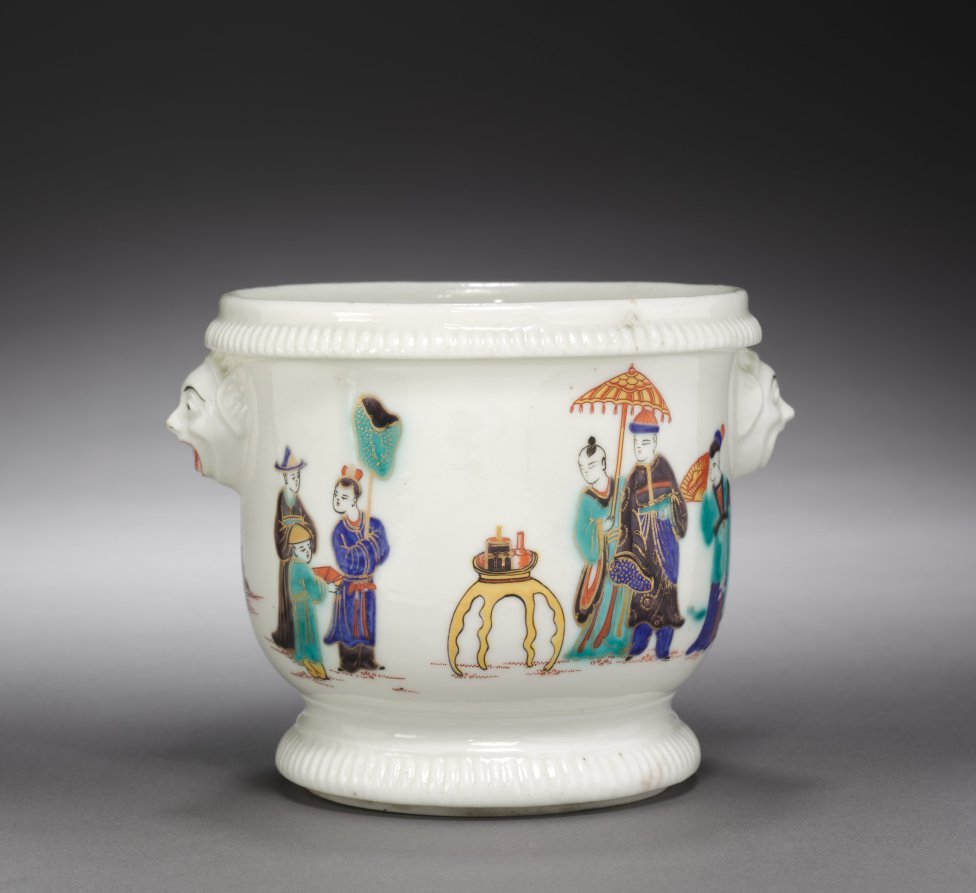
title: Bottle Cooler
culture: France, Saint Cloud, 18th century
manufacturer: Saint Cloud Porcelain Factory (French)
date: c. 1725– 1735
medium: soft-paste porcelain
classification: Ceramic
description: The form of these cachepots is entirely typical of Saint-Cloud porcelain of about 1725. Their decoration, based upon Chinese porcelains of the so-called "famille-verte" type, is most unusual. Polychromed enamels were not often employed on Saint-Cloud porcelains, and figural scenes are very rare.